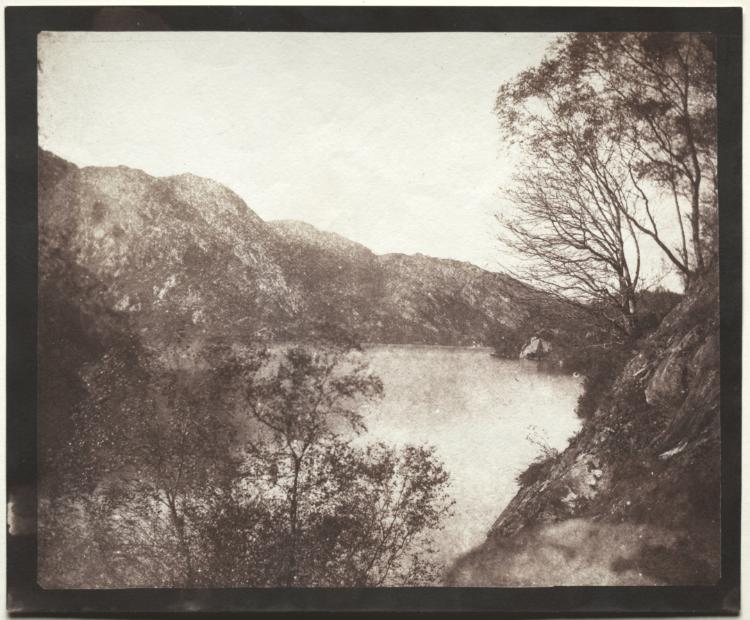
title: Loch Katrine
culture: England, 19th century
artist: William Henry Fox Talbot (British, 1800–1877)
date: 1844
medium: salted paper print from calotype negative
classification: Photograph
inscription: Written in black ink on verso: "LA 36"